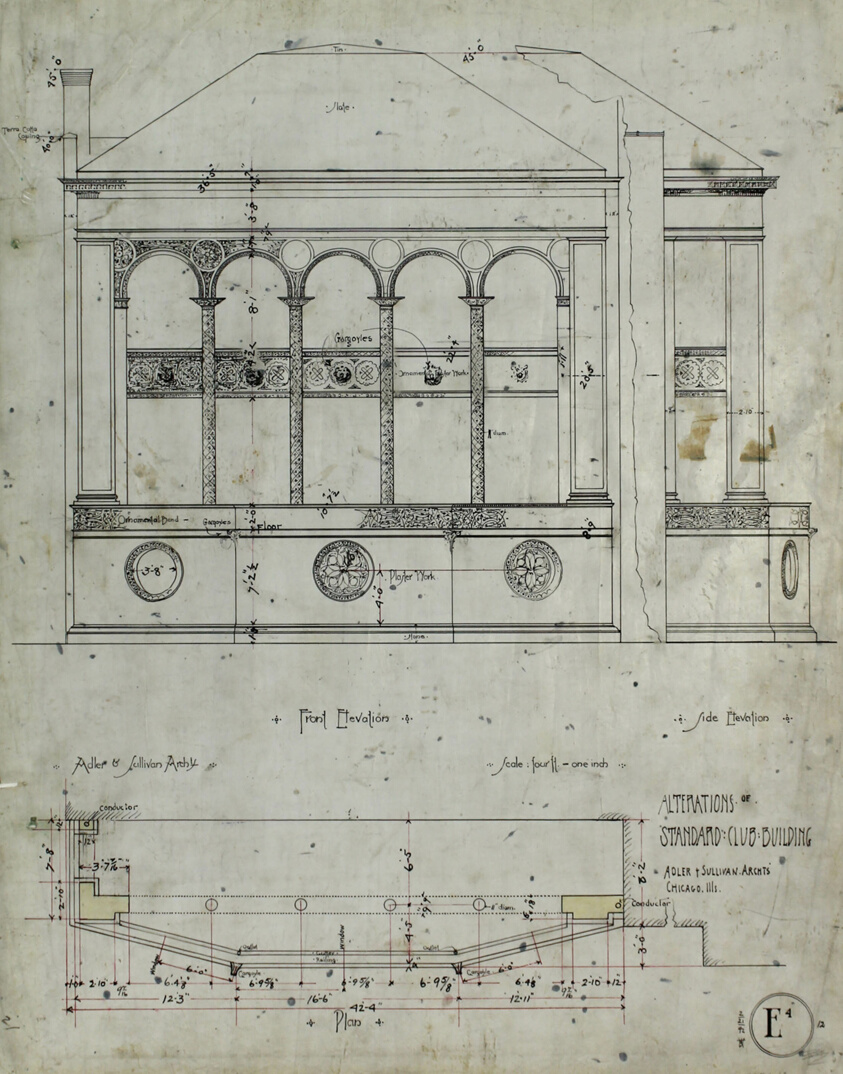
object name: Architectural Drawing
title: Standard Club Addition and Alterations, First Floor Plan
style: 19th century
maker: Adler & Sullivan, Architects (American, 1883–1895)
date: 06/21/1892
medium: Black and red ink on draughting linen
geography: Michigan Avenue at 24th Street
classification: architectural working drawing; architectural drawing; architecture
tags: architecture